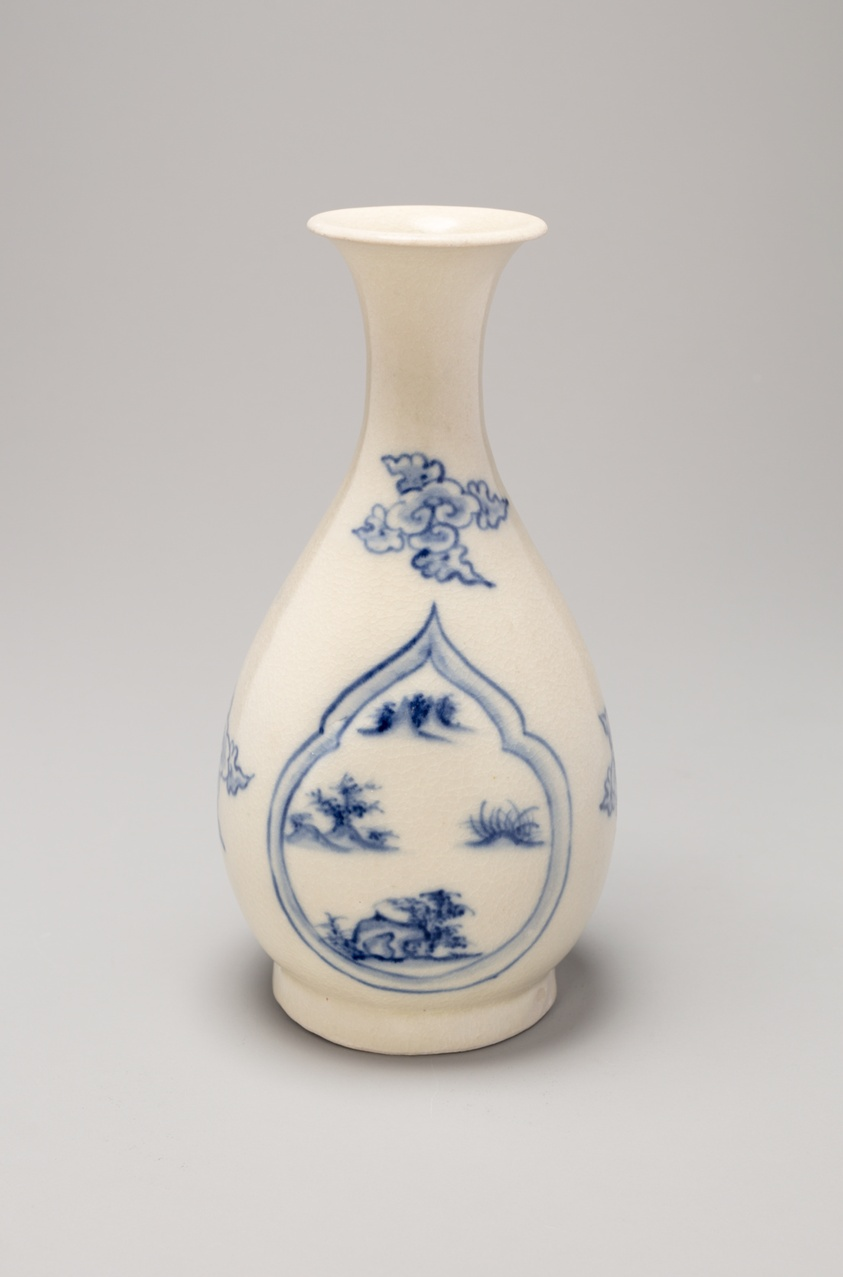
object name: Vessel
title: Pear-Shaped (Yuhuchun) Bottle with Everted Lip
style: Southeast Asian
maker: Vietnam; near Hoi An (offshore)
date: Late 15th/early 16th century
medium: Glazed stoneware with cobalt-blue underglaze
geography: Vietnam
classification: porcelain; vessel; bottle